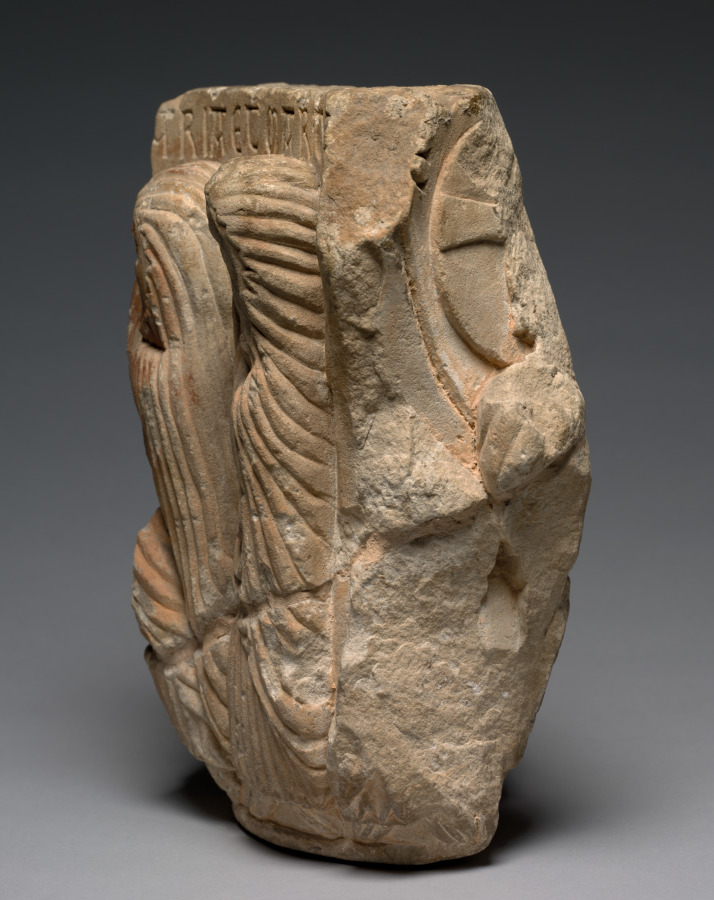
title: Fragment of a Double Capital: Mary and Martha at the Raising of Lazarus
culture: Southwest France, Ariège, region of Foix, mid-12th century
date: 1145–1165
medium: quartz sandstone with traces of polychromy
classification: Sculpture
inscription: inscription above the draped figures of Mary and Martha: "MARIA ET MARTA"; to the left of the two figures is a portion of a decorated sarcophagus depicted in the lower half with an inscription of Christ's words: "VENI FORAS" ([Lazarus] come forth).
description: The front face of this capital fragment presents the two mourning women identified by the inscription above: MARIA ET MARTA. On the left face appears the body of Lazarus in a sarcophagus bearing Christ's words: VENI FORAS ("[Lazarus], come forth" [John 11:43]). The Raising of Lazarus is one of the most popular themes in Christian art. This miracle represents Christ's power over death and thus prefigures the Resurrection. It also speaks of the hope of resurrection for all individuals, a common theme in early Christian catacombs and sarcophagi. The subject is less prevalent in sculpture of the Romanesque period, though quite popular in other media.